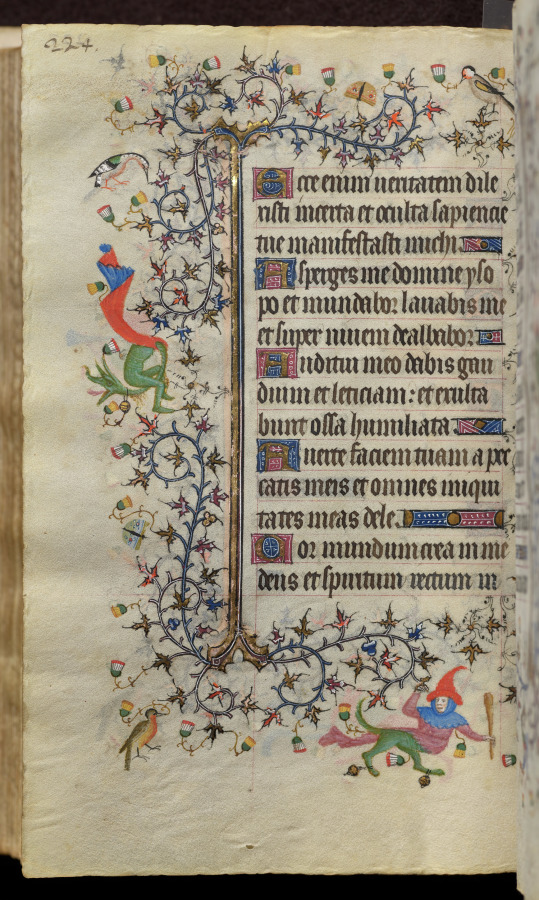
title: Hours of Charles the Noble, King of Navarre (1361-1425): fol. 112v, Text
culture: France, Paris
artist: Master of the Brussels Initials and Associates (French)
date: c. 1405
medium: ink, tempera, and gold on vellum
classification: Bound Volume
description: This precious book was highly prized by its owner, Charles III, King of Navarre, a French-born prince whose coat of arms is painted on 20 folios. Charles visited Paris on numerous occasions and likely acquired this volume there in 1404. Paris was the center of the European book trade at the time and attracted illuminators from many parts of Europe. This manuscript represents one of the most remarkable fusions of French and Italian taste in book illumination. Though conforming to Parisian standards, most of the book’s major miniatures are the work of the Brussels Initials Master, an Italian illuminator who previously worked in Bologna and Padua.